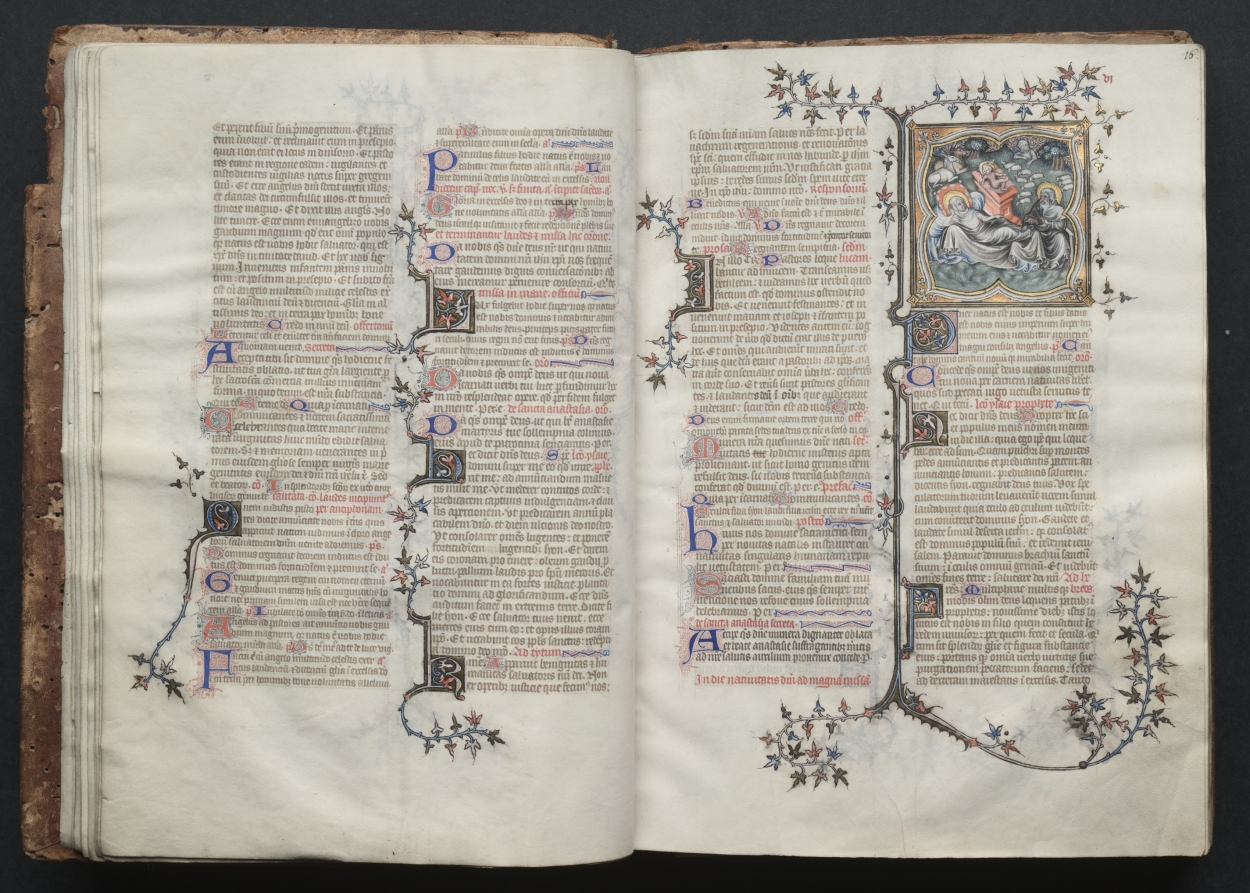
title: The Gotha Missal: Fol. 16r, Nativity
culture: France, Paris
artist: Master of the Boqueteaux (French)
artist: and Workshop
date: c. 1375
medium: ink, tempera, and gold on vellum; blind-tooled leather binding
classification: Bound Volume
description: The style and quality of this manuscript's decoration is typical of deluxe Parisian books made for aristocratic or royal patrons. Most of the book's decoration appears to be the work of the Master of the Boqueteaux, an artist active at the court of King Charles V (died 1380). His style was apparently shared by a number of book illuminators working in and around Paris. It is very possible that the Gotha Missal belonged to Charles V, but is not provable because the manuscript has no royal portraits and lacks a colophon. Given the book's magnificent decoration, however, it would seem that it was produced for a Valois prince, if not for the king himself. The manuscript receives its name from the German dukes of Gotha, its later owners.